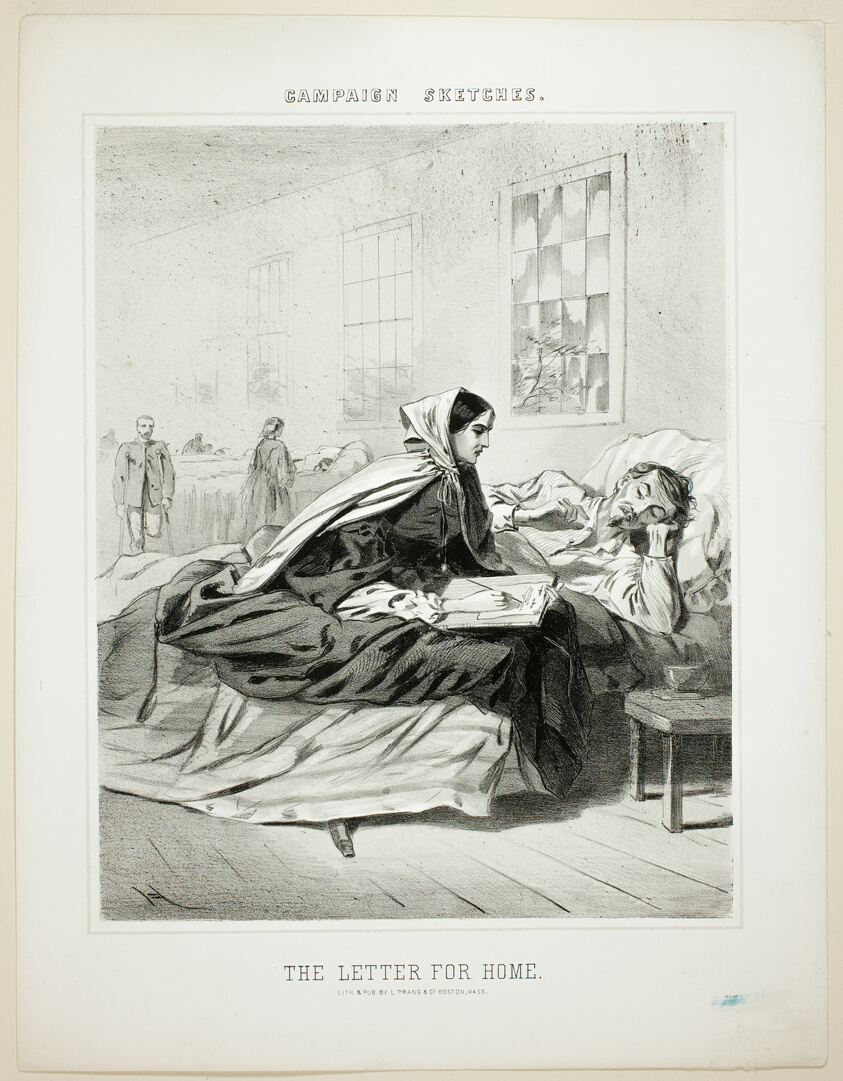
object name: Print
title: Campaign Sketches: The Letter for Home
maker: Winslow Homer (American, 1836–1910)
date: 1863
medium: Tint lithograph on heavy ivory wove paper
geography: United States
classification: lithograph; print; prints and drawing